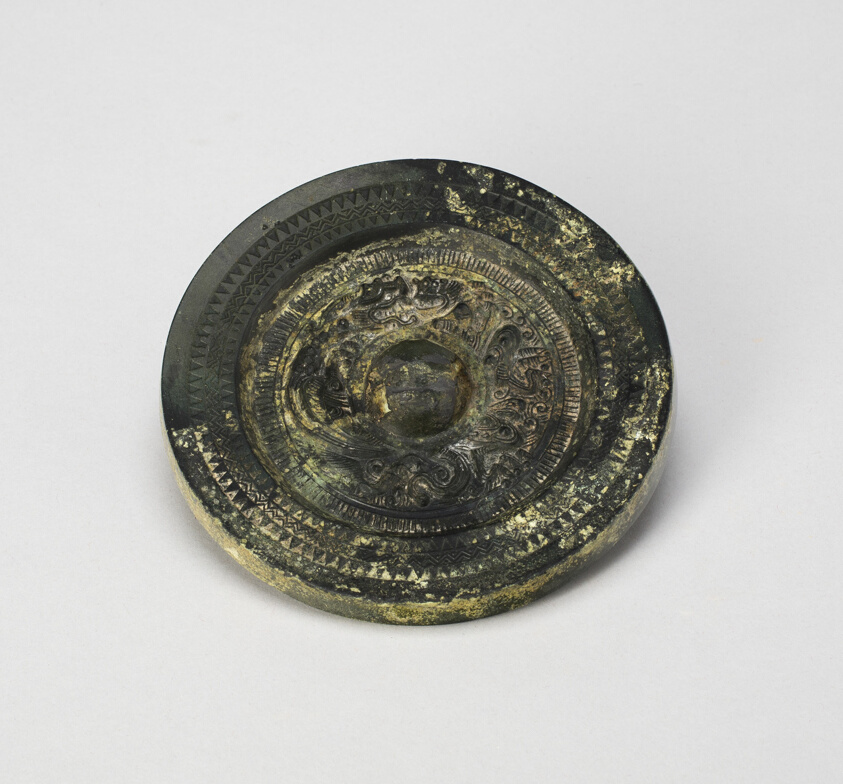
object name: Decorative Arts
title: Mirror with Dragon and Tiger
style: Chinese (culture or style)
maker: China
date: Eastern Han dynasty, 25–220 CE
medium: Bronze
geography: China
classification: bronze; metal; mirror; asian art; decorative arts